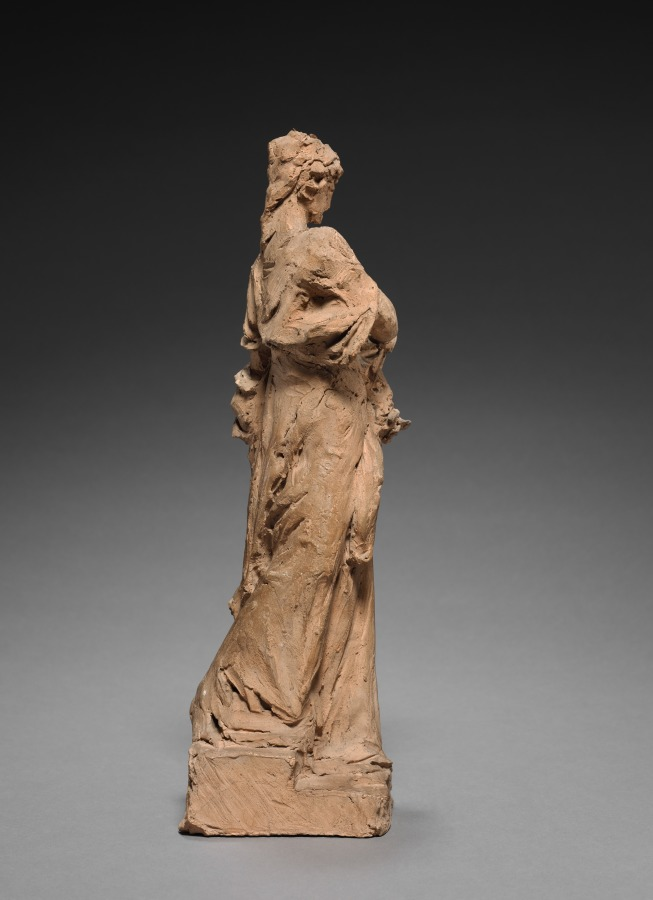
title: Judith with the Head of Holofernes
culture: France, 19th century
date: mid-1800s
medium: terracotta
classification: Sculpture